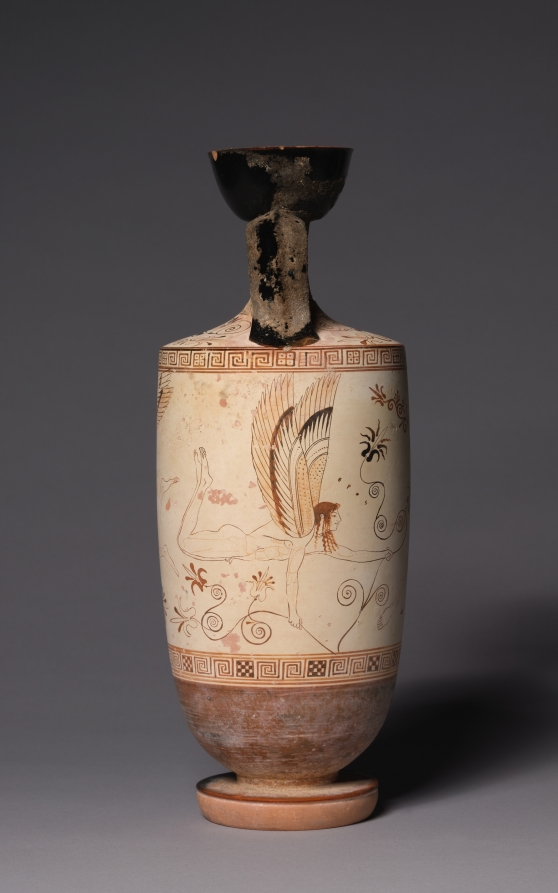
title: White-Ground Lekythos (Oil Vessel): Atalanta and Erotes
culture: Greek, Attic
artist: attributed to Douris (Greek, Attic, active c. 500–470 BCE)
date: 500–490 BCE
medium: ceramic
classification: Ceramic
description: Known as "white-ground" because of the white clay slip applied as a surface for figural decoration, vases of this type give some idea of the appearance of lost ancient large-scale wall paintings. Both remarkably well preserved and masterfully composed, the images cover the entire circumference of the vase. At the center, Atalanta, the virgin huntress renowned for both her speed and her opposition to marriage, races to the right while looking back at Eros, the winged god of love; both figures are named. This Eros, bounding forward, tries to crown her, while two additional Erotes (also named) further hem her in. Love will win.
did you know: Eros, god of love, appears three times on this vase.